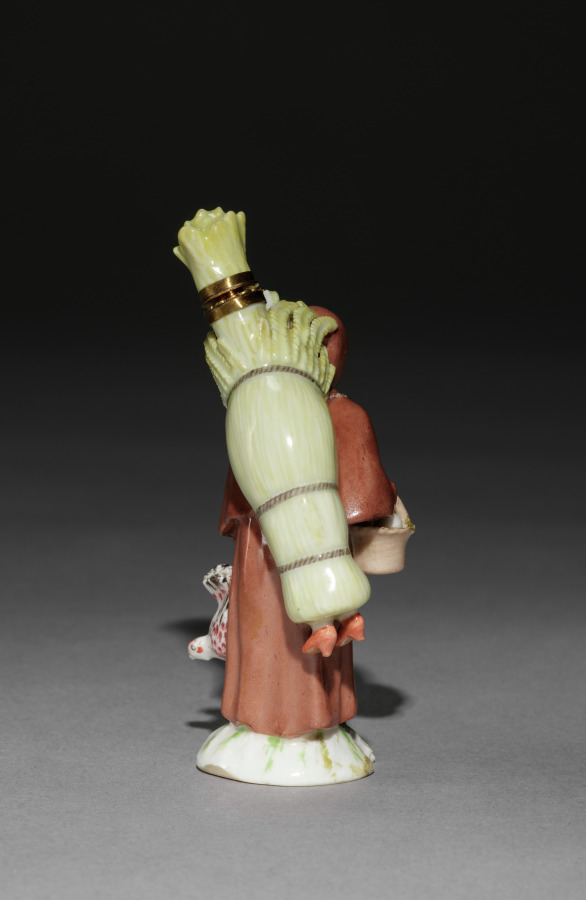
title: Scent Bottle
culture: Germany, Berlin, 18th century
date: 1780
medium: porcelain with gilt metal mounts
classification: Miscellaneous